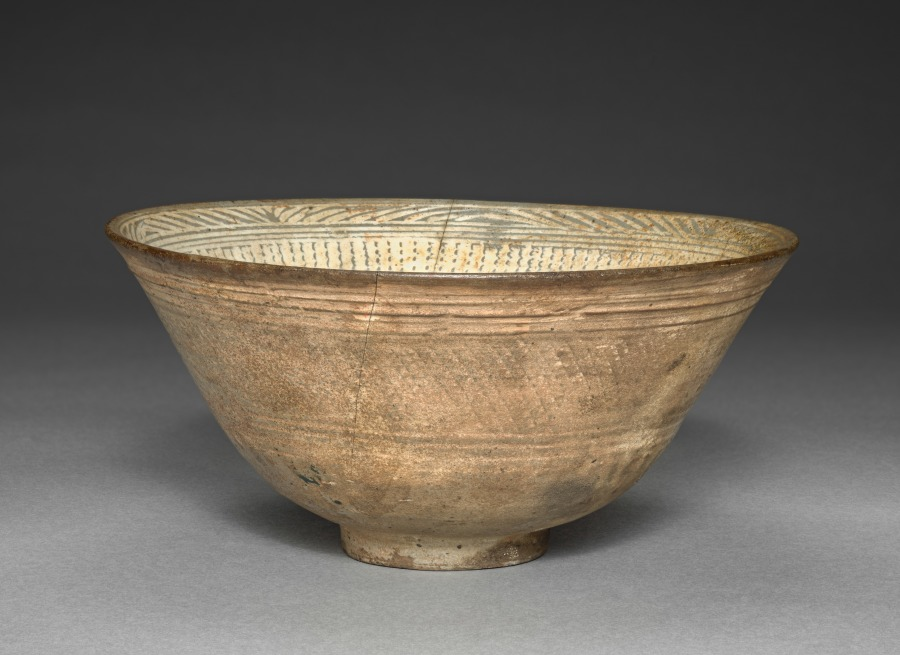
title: Bowl with Stamped Floral Decoration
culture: Korea, Joseon dynasty (1392–1910)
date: 1600s–1700s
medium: glazed ceramic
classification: Ceramic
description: This type of wide-mouthed bowl was used everyday in Korea, not exclusively for tea drinking. But when it was introduced to Japan around the early 16th century, its imperfect appearance evoking the aesthetics of wabi-sabi caused it to be repurposed as tea bowls in Japan. Possibly produced in one of the kilns established by the trading office (Waegwan) in Busan, southern Gyeongsang province, this type of bowl was sold to Japanese elite collectors.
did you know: This type of humble tea bowl was highly praised among Japanese collectors for its imperfect beauty.